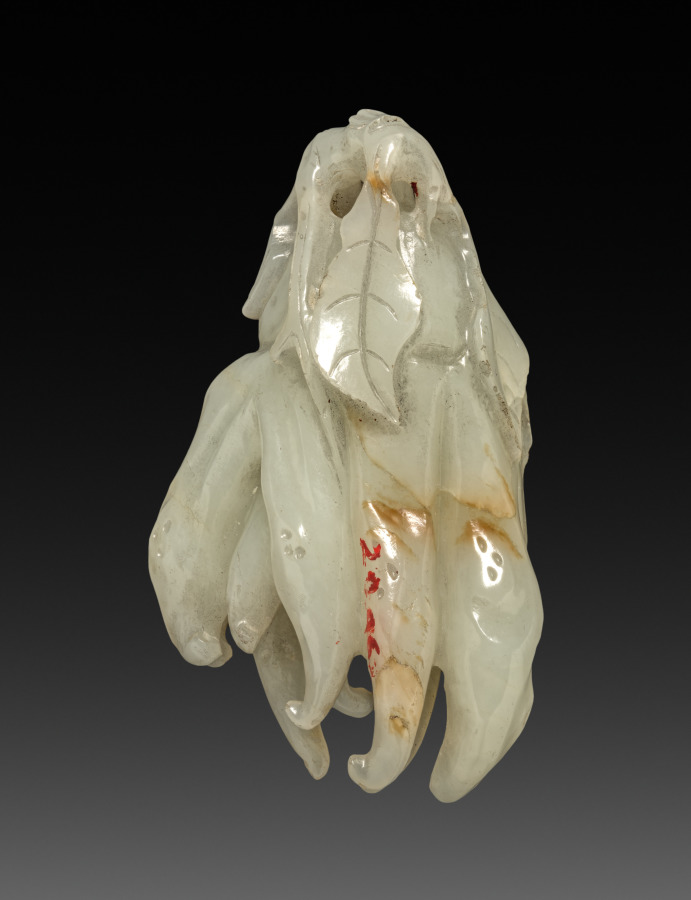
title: Pendant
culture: China, Qing dynasty (1644-1911)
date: 1644–1911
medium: jade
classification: Jade